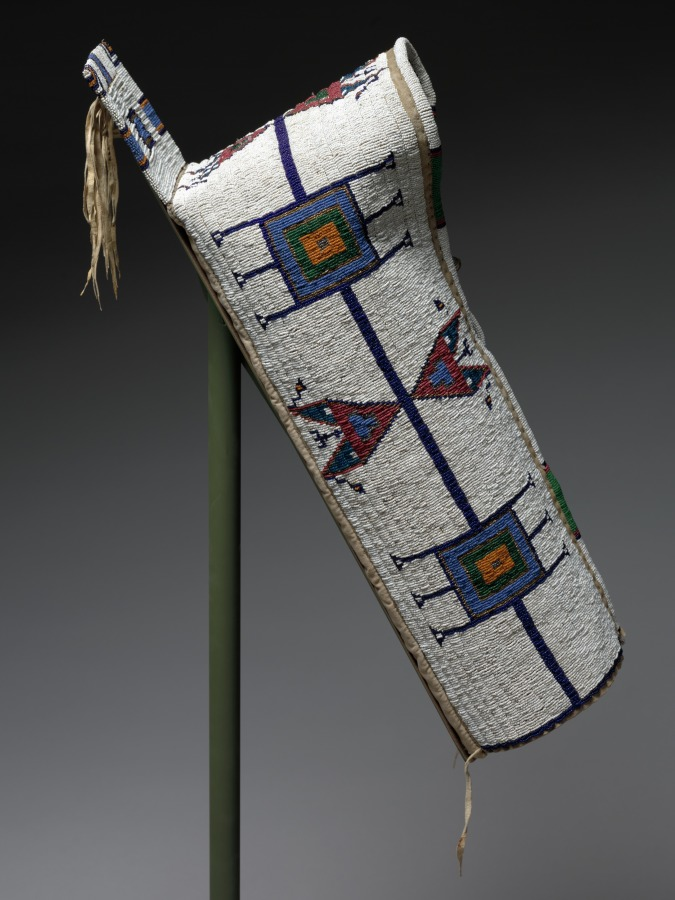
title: Cradle or Baby Carrier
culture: Native North America, Plains, Lakota (Sioux)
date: c. 1900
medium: Native-tanned hide, cotton cloth, glass beads, metal beads, brass bell, sinew thread, cotton thread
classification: Leather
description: Many Plains peoples hold lavishly quilled or beaded cradles in high esteem—they bestow spiritual benefits on the infant and prestige and honor on the family and the maker, usually a female relative. Indeed, today and in the past, creating such a cradle is often regarded as equal to counting coup, the ultimate act of male bravery in which a warrior touches an enemy with a stick known as a coup stick. This cradle was held in the arms; others have wooden frames that can be propped against a support, such as a sofa or a tree, to ease the baby’s socialization into the community.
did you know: In the past, young Plains children spent much of their time in cradles, which remain in occasional use today.